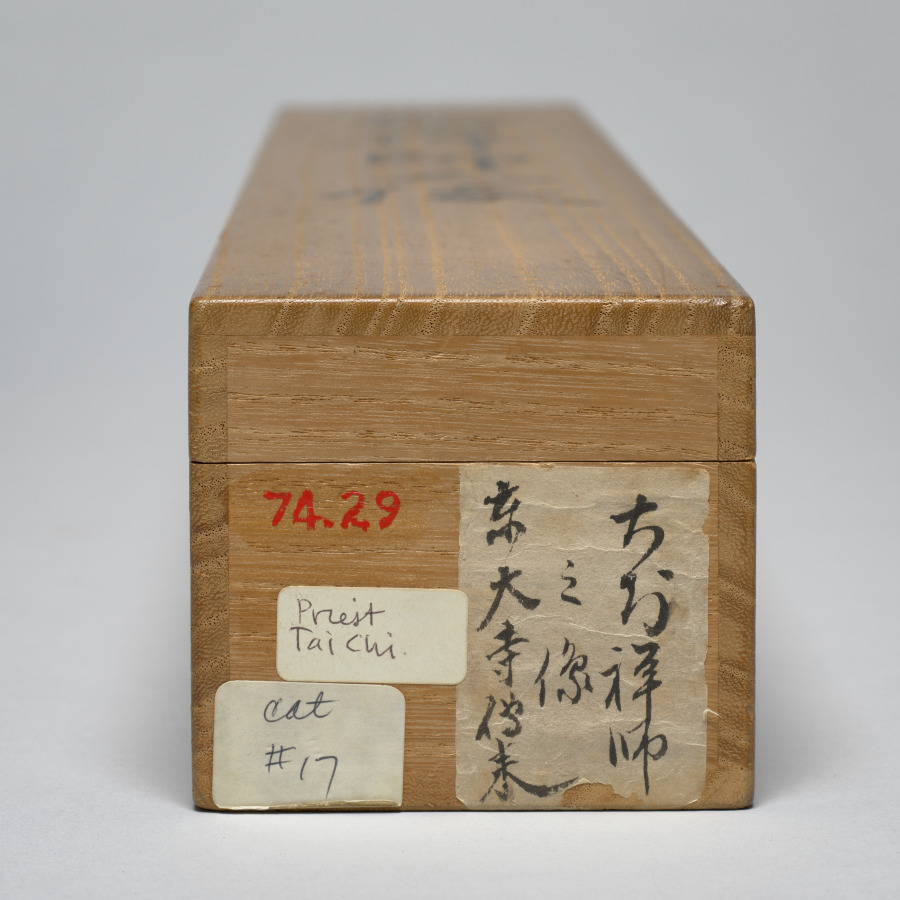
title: Portrait of Priest Dazhi (1048–1116), Master of Law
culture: China, Southern Song dynasty (1127-1279)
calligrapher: Liu Tao (Chinese, late 1000s–early 1100s)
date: 1100s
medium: Hanging scroll; ink and light color on silk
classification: Painting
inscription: Inscription by Liu Tao (late 1000s–early 1100s): Dignified with the perfection of the upasampada,/ His appearance is like his mind;/ Uncompromising and loftily aloof,/ His mind is like his appearance./ To say he is square, he proves to be round;/ He looks timid, yet his spirit is unbound./ Having no attachment, and holding no reins,/ Man and deities alike take refuge in him. (Translation by WKH, 1980)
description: Monk Yuanzhao, with the honorific title Dazhi Lüshi, Great Wisdom Master of Vinaya, is depicted here as an itinerant monk, holding his alms bowl in the left and staff in the right. In 1142, Emperor Gaozong had bestowed Yuanzhao with a posthumous title, mentioned in the inscription, which suggests that the portrait was made after the master’s death. A master of the Lü sect of Buddhism, with a calm benevolent smile on his face, Yuanzhao was active on Mount Tiantai and in Hangzhou. Later, Liu Tao, a southerner from Changxing, added the inscription. The eulogy reads: Dignified he is, perfect in his upasampada [ordination of a monk]. His appearance is like his mind. Uncompromising and aloof. His mind is like his appearance. To say he is square, he proves to be round. He looks timid, yet his spirit is unbound. Having no attachment, and holding no reins, men and deities alike take refuge in him. —translated by Wai-Kam Ho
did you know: A native of Hangzhou, the priest Dazhi was known for his eloquent exposition of Buddhist doctrines and for his success in winning many converts.